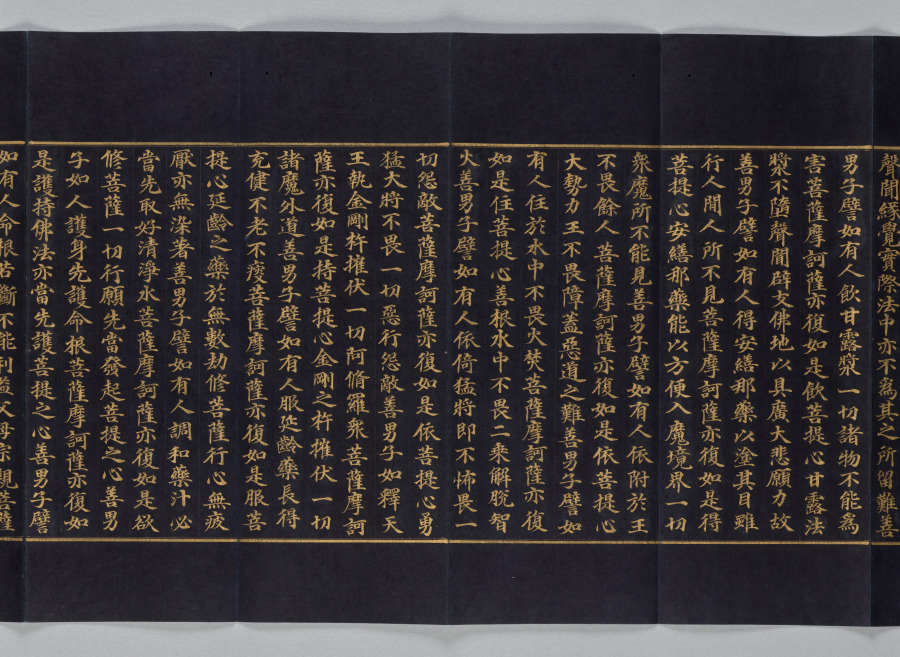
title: Avatamsaka Sutra No. 78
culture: Korea, Goryeo dynasty (918–1392)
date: 1300s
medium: Folded book with illustrated frontispiece; gold and silver on mulberry paper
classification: Bound Volume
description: This illuminated manuscript presents one part of the multivolume sacred text titled Avatamsaka (Flower Garland) sutra. Both the script and the image are rendered in gold ink on the smooth surface of the dark blue, indigo-dyed mulberry paper. This portion of the text, which reads from right to left, describes the encounter of the Buddha of the Future (Maitreya) and the young pilgrim Sudhana. The Buddha gives his words of wisdom to Sudhana, who asks questions about the path toward spiritual awakening. Mixed with ink and glue, the gold has a brilliance that strikingly reflects Sudhana’s ardent quest for understanding the way to reach enlightenment.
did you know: The pristine condition of this manuscript indicates that it was rarely used after its creation, revealing that the act of making a manuscript rather than reading it was the main religious goal.